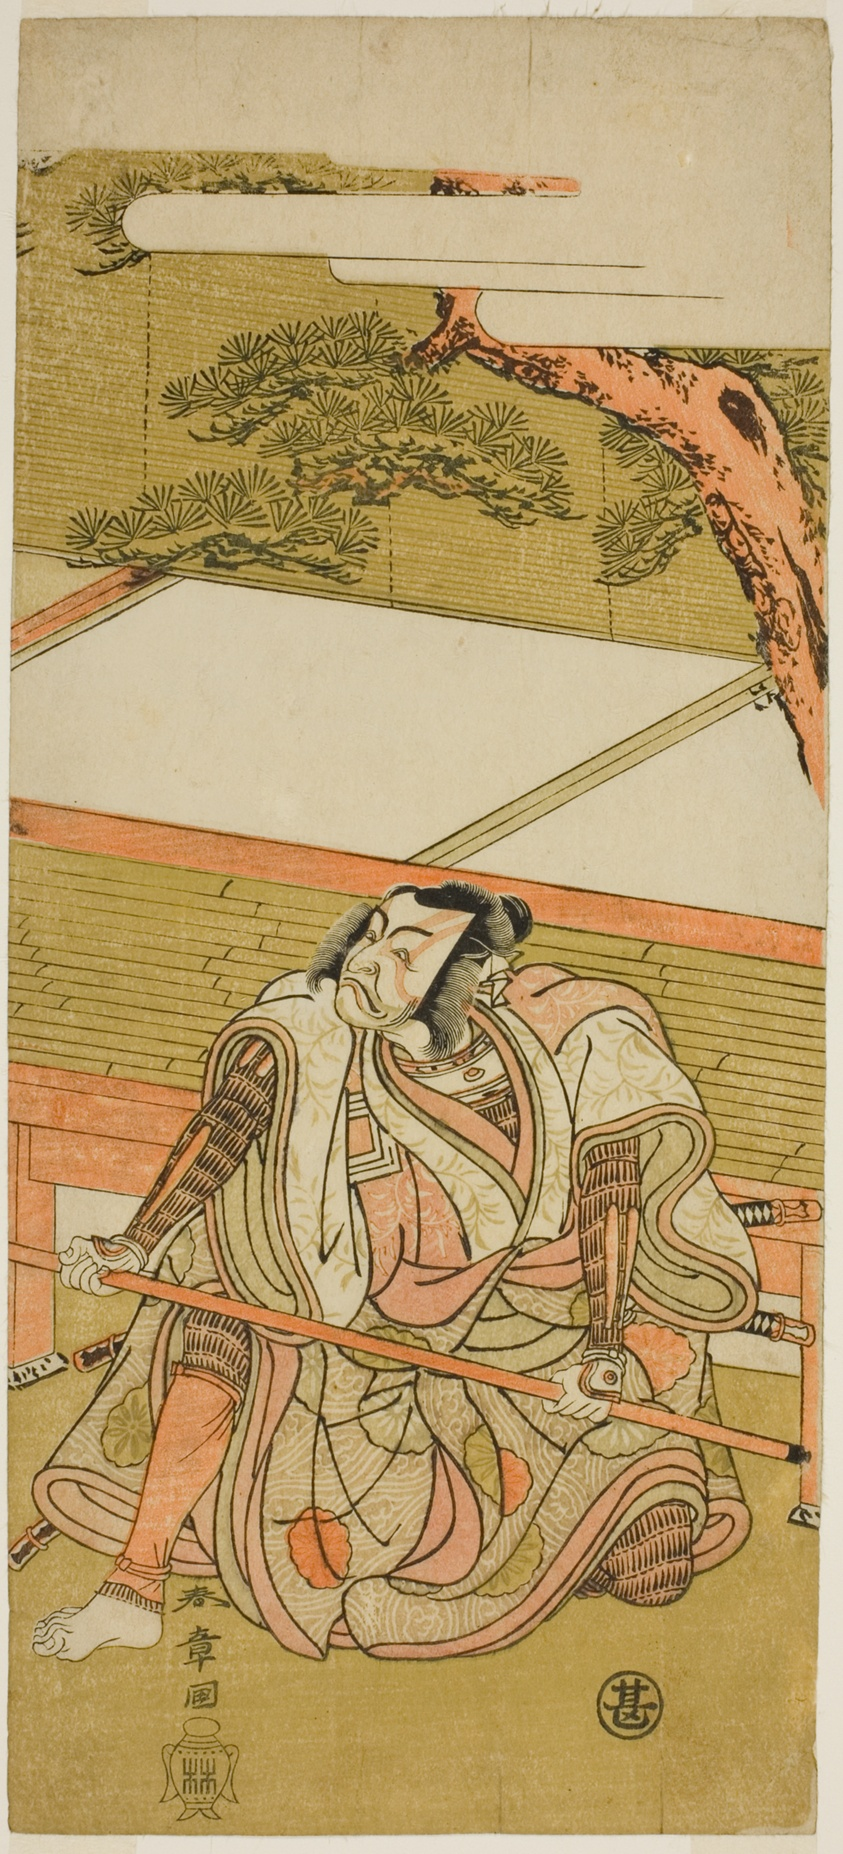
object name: Print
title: The Actor Ichikawa Ebizo III as Akushichibyoe Kagekiyo (?) in the Play Wada Sakamori Eiga Kagami (?), Performed at the Nakamura Theater (?) in the Third Month, 1773 (?)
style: Japanese (culture or style)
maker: Katsukawa Shunsho 勝川 春章; Japanese, 1726-1792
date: c. 1773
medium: Color woodblock print; hosoban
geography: Japan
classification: print